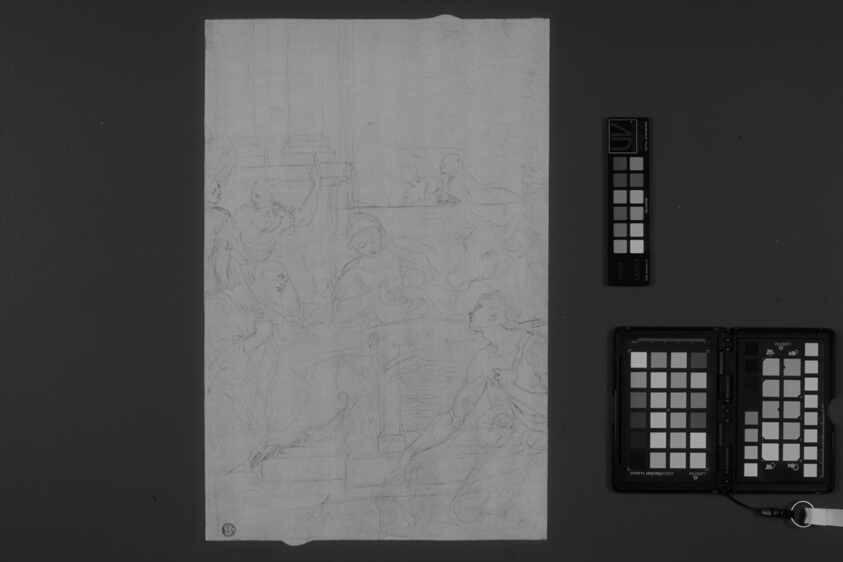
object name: Drawing and Watercolor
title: Adoration of the Shepherds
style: medieval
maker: Attributed to Agostino Carracci; Italian, 1557-1602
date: c. 1580-1600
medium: Pen and brown ink, over black chalk, with incising, on tan laid paper, laid down on ivory laid paper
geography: Italy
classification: pen and ink drawings; manuscript; drawings (visual works); prints and drawing